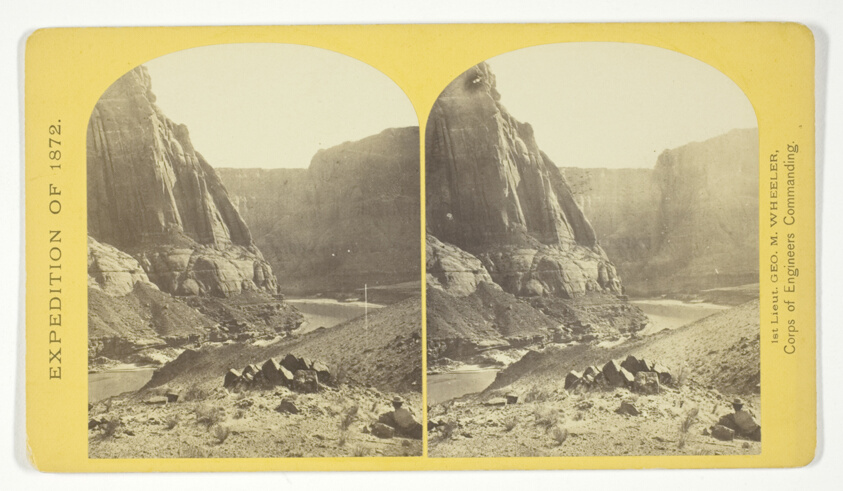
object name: Photograph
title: Mouth of the Paria, Colorado River; walls 2.100 feet in height, No. 11 from the series "Geographical Explorations and Surveys West of the 100th Meridian"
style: 19th century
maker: William H. Bell (American, 1830-1910); commissioned by George Wheeler for the War Department, Corps of Engineers, U.S. Army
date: 1872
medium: Albumen print, stereo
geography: United States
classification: stereograph (albumen); photography; photograph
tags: Collected by Hugh Edwards, Geographical Explorations and Surveys